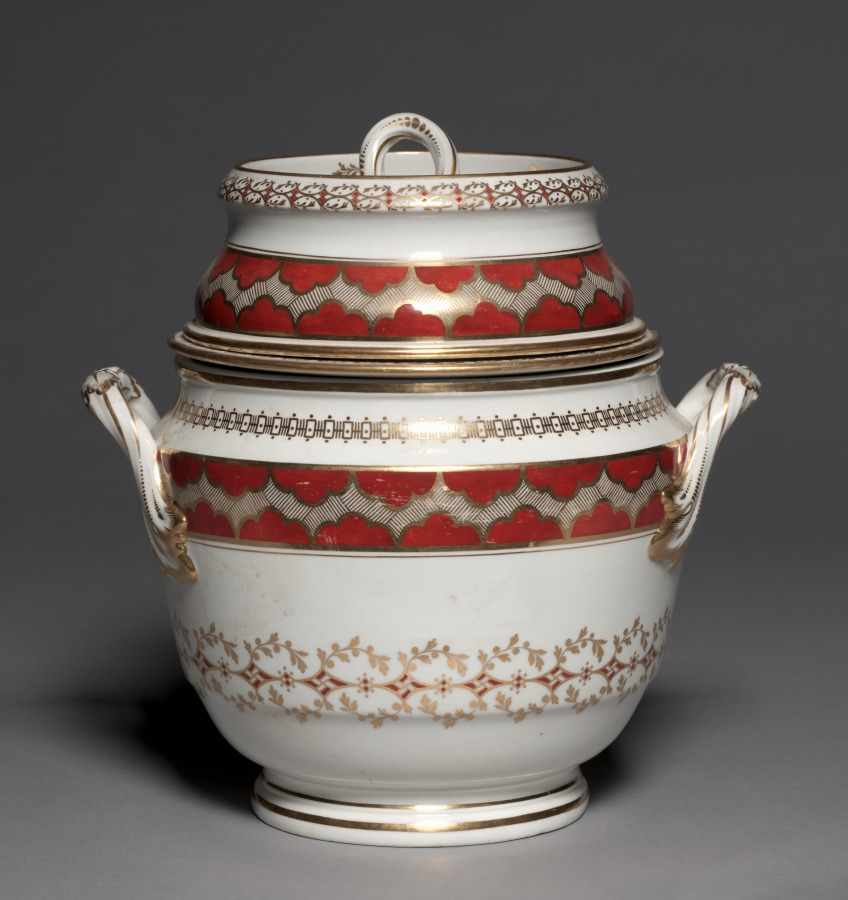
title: Ice Pail (1 of 2)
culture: England, late 18th-early 19th Century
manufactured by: Flight & Barr (British)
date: 1793–1807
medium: porcelain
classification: Ceramic